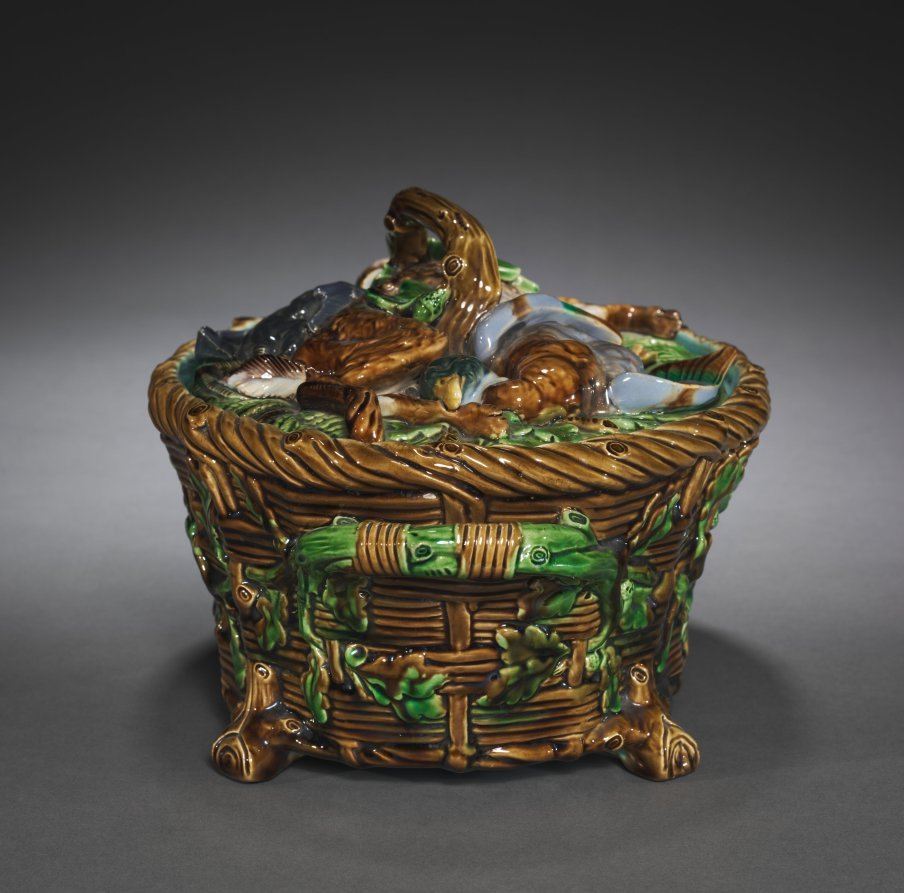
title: Game Pie Dish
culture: England, 19th century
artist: Minton Pottery and Porcelain Factory (British)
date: c. 1860–80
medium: earthenware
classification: Ceramic